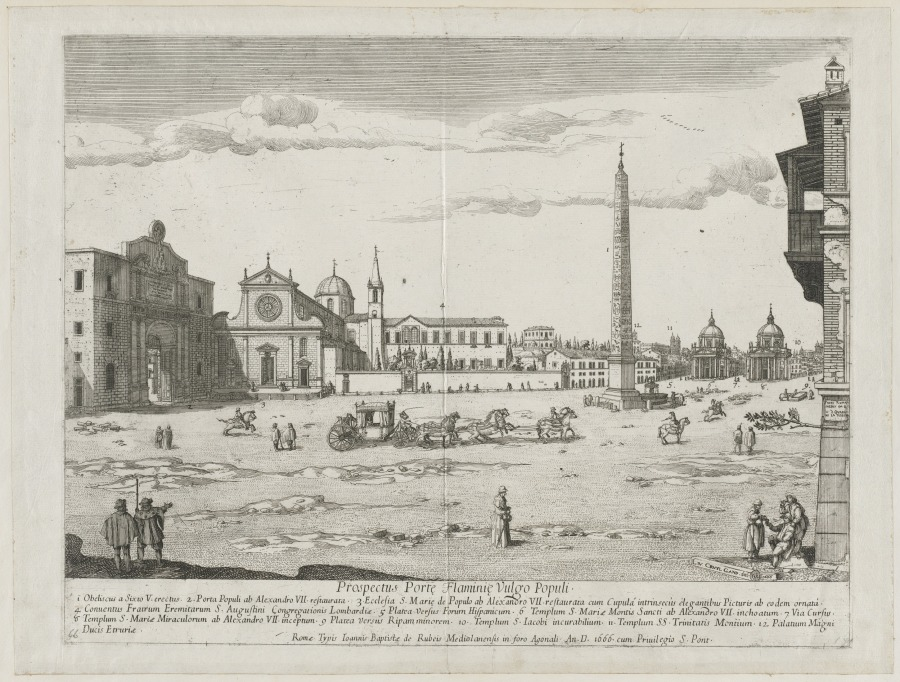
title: "Prospectus Locurum Urbis Romae Insign[ium]"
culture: Flanders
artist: Lievin Cruyl (Flemish, c. 1640-c. 1720)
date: 1666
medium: etching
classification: Print